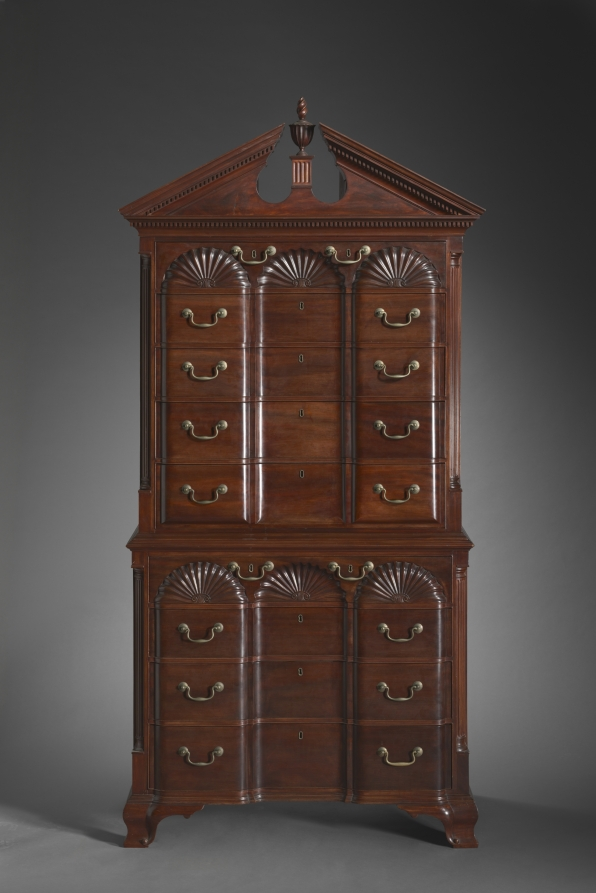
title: Chest-on-Chest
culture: America, Rhode Island, Providence, early 19th Century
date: c. 1800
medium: mahogany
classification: Furniture and woodwork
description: Block-fronted case furniture-that is, pieces with façades that vary in the plane of their relief by extending forward at the sides and receding in the center-decorated with carved shell ornaments, has long been among the most admired of 18th-century American furniture. The sophisticated examples of such pieces were presumed to have been made in Newport, Rhode Island, particularly by members of the Townsend and Goddard families. However, recent scholarship convincingly hypothesizes that some of the finest pieces of this type of furniture were, in fact, made in Providence, Rhode Island-many of them, such as this chest, for members of the Brown family, inhabitants of that city. This piece was probably made for either Nicholas Brown (1729-1791) or, more likely, his son Nicholas Brown Jr. (1769-1841). The museum's chest-on-chest can be related stylistically and technically to other Providence pieces, but it is not yet clear who made them. Members of two cabinetmaking families, the Carliles and the Rawsons, are among the most likely candidates.